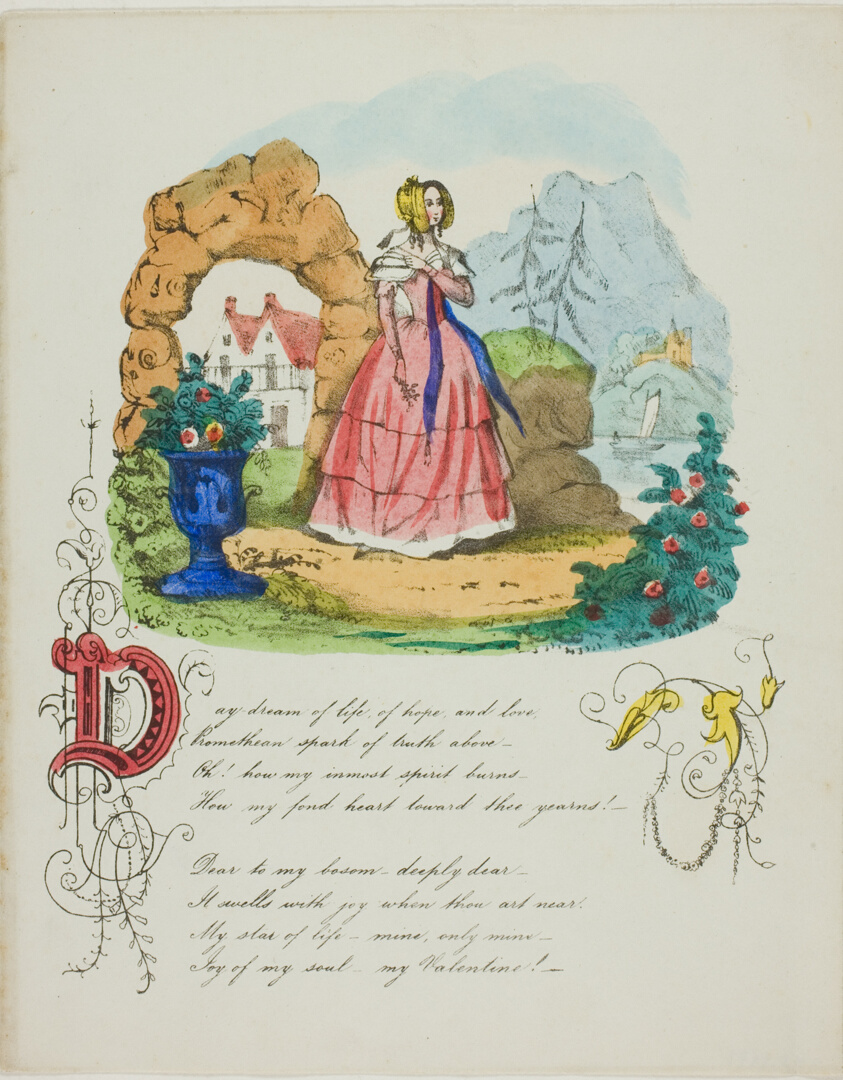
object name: Print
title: Day Dream of Life, of Hope, and Love (valentine)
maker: Unknown Artist; English, 19th century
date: c. 1842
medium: Lithograph with hand-coloring on ivory wove paper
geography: England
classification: valentine; prints and drawing; print